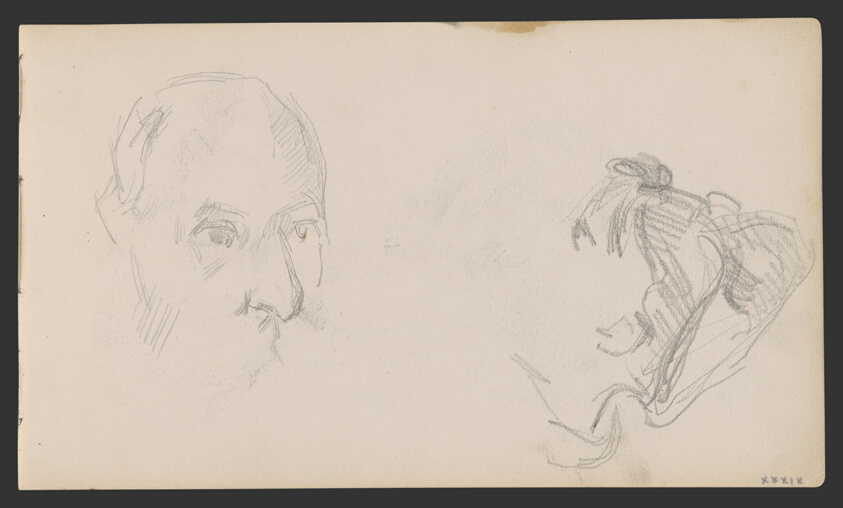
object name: Drawing and Watercolor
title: Sketchbook No. 2 (L'Estaque)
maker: Paul Cézanne; French, 1839-1906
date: 1875–86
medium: Graphite and pen and ink drawings on paper, bound into a book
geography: France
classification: sketchbook; graphite; prints and drawing; paper